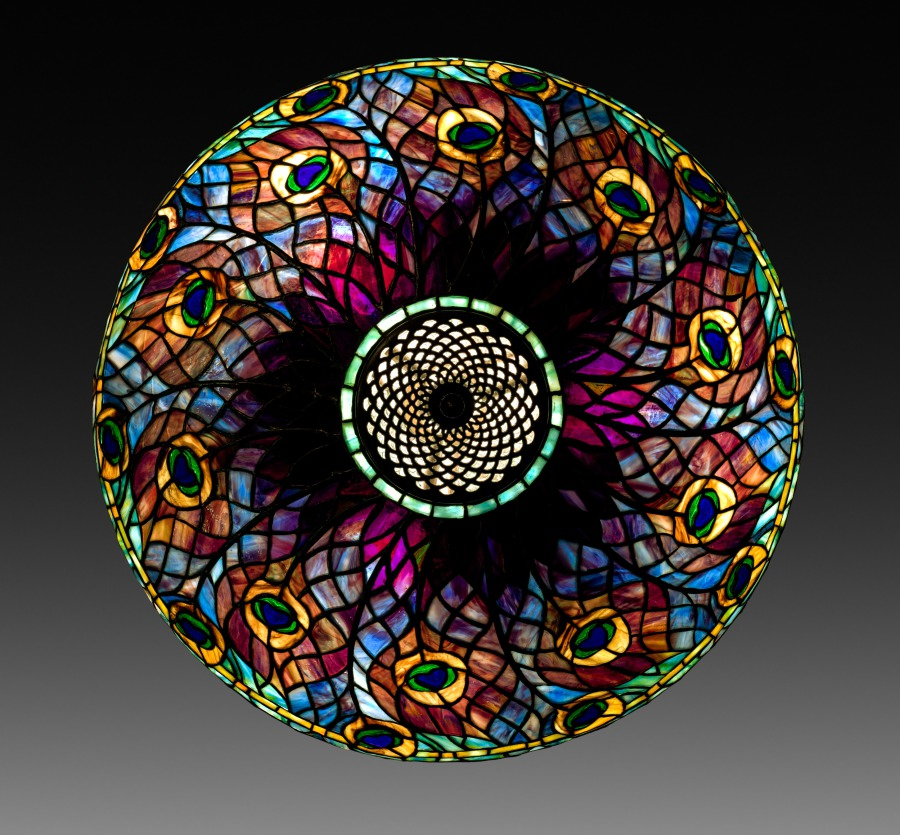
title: Peacock Table Lamp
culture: America, New York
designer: probably by Clara Wolcott Driscoll (American, 1861–1944)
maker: Tiffany Studios (United States, New York, 1902–32)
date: c. 1902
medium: Leaded glass, bronze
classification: Lamp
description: The peacock, with its brilliantly colored iridescent plumage, was a favorite motif of Louis Comfort Tiffany, appearing in almost every genre of his artistic production. The Peacock table lamp, created by Tiffany's chief lamp designer Clara Wolcott Driscoll, evokes the wide circular swath of a peacock's preening feathers and attracted critical acclaim to both Driscoll and Tiffany Studios. This particular version retains its original kerosene burning fluid apparatus as well as an electric bulb armature. Although incandescent lamp bulbs had become more widely available in the 1890s, most households, even those of the wealthy, were not yet wired for electricity. Tiffany originally designed his lamps with an oil-burning apparatus, consisting of a reservoir and a double wick and chimney, as well as an electric attachment. He cleverly predicted, though, that electric households would eventually become commonplace, so he soon moved to all-electric designs, greatly increasing the illumination and appeal of his lamps.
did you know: Originally designed to burn kerosene, this Peacock lamp still retains its original double wick and oil reservoir along with an adapter for electric light bulbs.